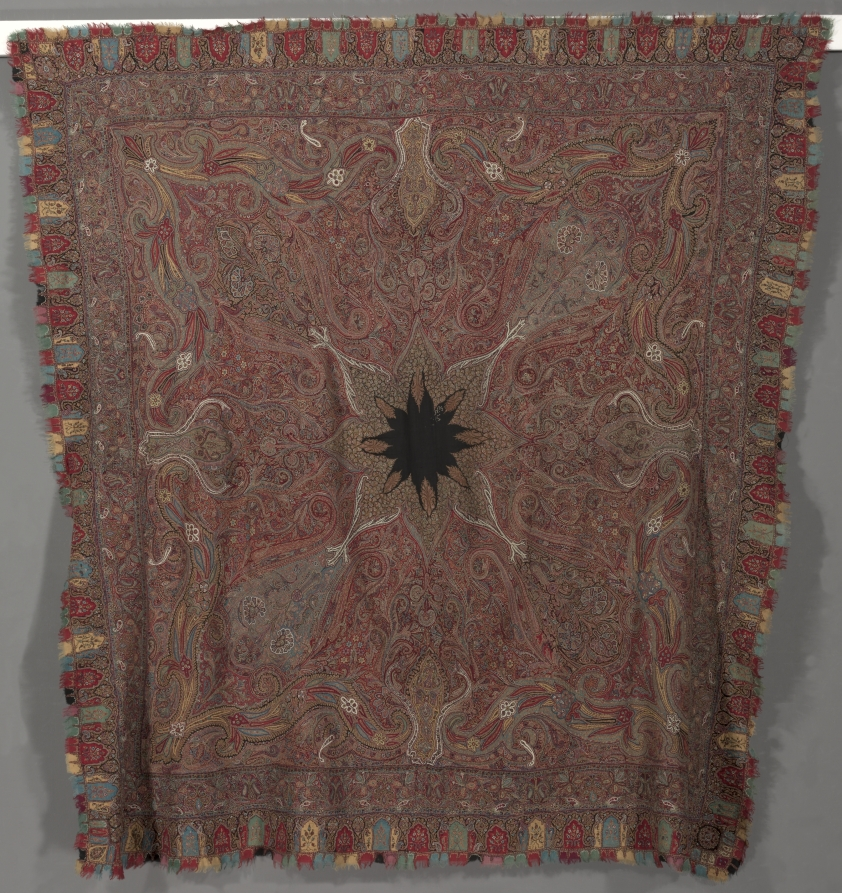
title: Square Pieced Shawl with Vase Corners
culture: India, Kashmir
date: 1867–75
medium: wool; 2/2 twill tapestry (S), double interlocked, pieced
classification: Textile